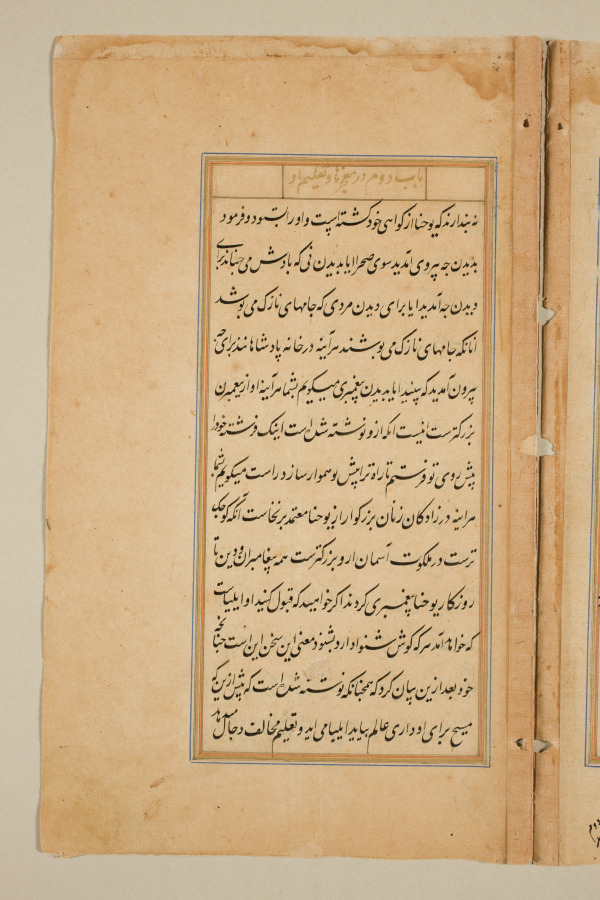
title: Text page from a Mirror of Holiness (Mir’at al-quds) of Father Jerome Xavier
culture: Mughal India, Allahabad, made for Prince Salim (1569–1627)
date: 1602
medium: Ink and gold on paper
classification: Manuscript